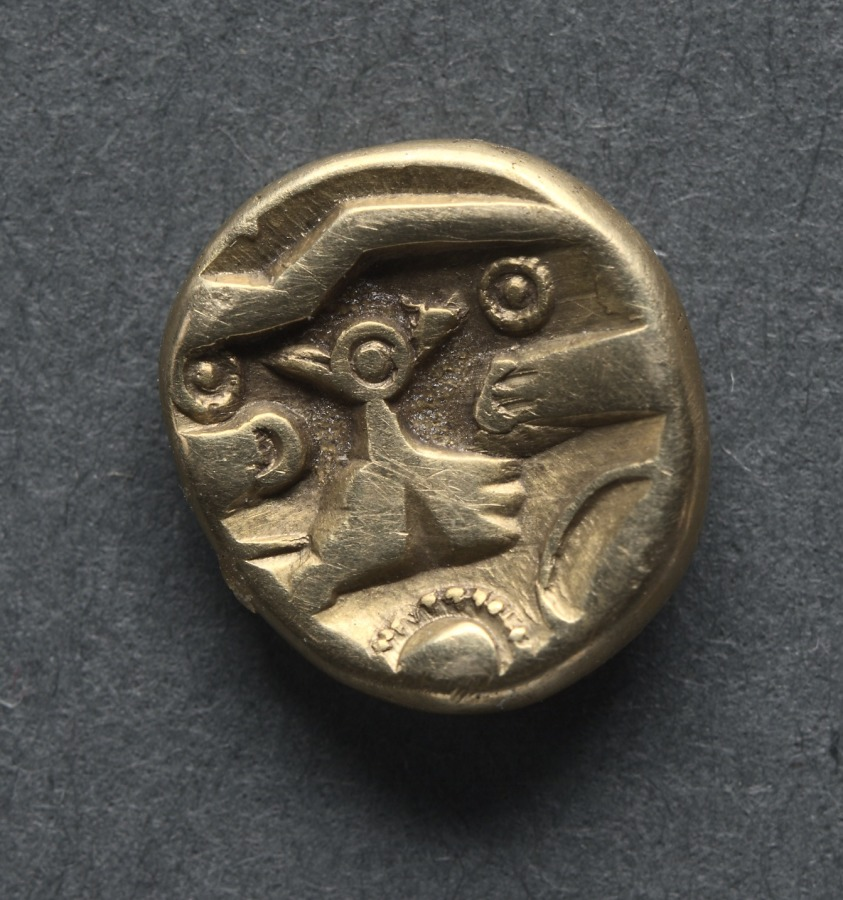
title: Quarter Stater: Tree (obverse); Plain Field (reverse)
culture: England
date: c. 125–20 BCE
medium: gold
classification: Coins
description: The smaller size of the quarter stater left the artist little room for design. Apparently he was unable to reduce the stater design to such small dimensions. The meaningless jumble is probably part of a larger design.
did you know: The tree-like trophy in the center sits on top of three ringed pellets, surrounded by various motifs.